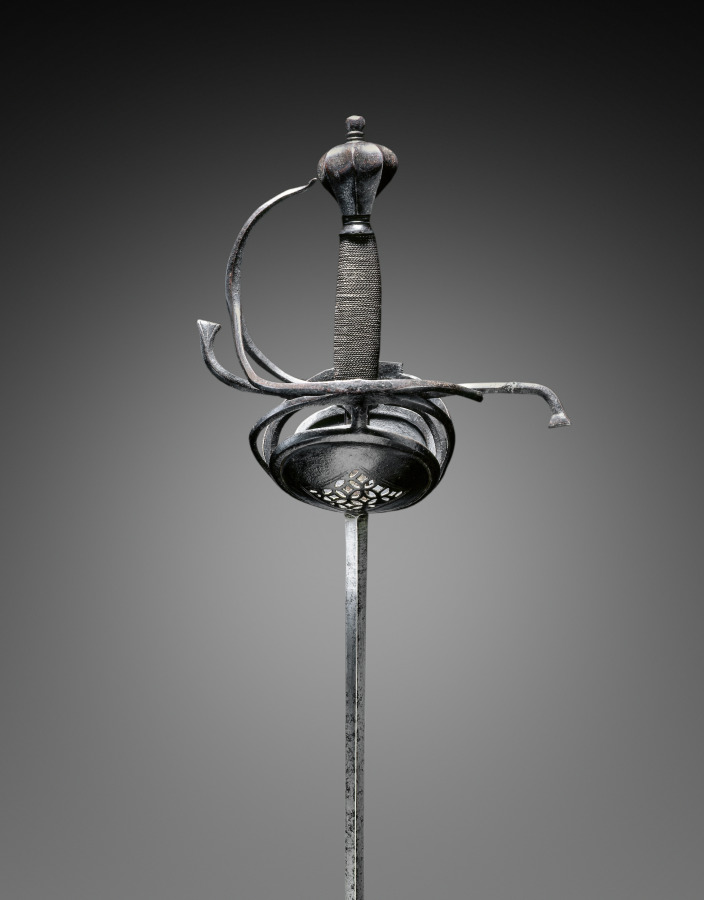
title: Rapier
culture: Italy, Milan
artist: Federico Picinino (Italian)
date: c.1625–50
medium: steel; hilt russeted; wire grip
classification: Arms and Armor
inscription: on ricasso: Federico Picinino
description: The rapier was a sword worn with civilian dress and used in duels. The term rapier derives from the 16th-century French word rapière, which in turn was derived from the Spanish espada ropera, or “dress sword.” The rapier was a light weapon with a straight double-edged and pointed blade that, with the development of the art of fencing in the 1500s and 1600s, gradually became narrower and lighter, and thus suitable for thrusts only. With the new technique of swordplay emphasizing the point of the blade, sword guards became more complex to protect the duelist’s unarmored hand. These elaborate guards were frequently decorated by various techniques—chiseling, bluing, russeting, and damascening.